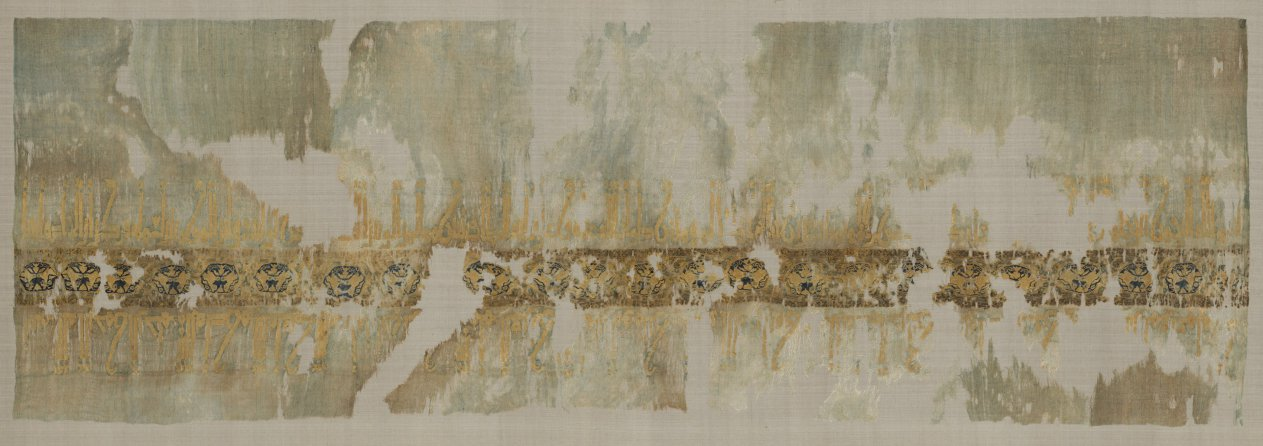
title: Turban end with tiraz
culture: Egypt, Tinnis, Fatimid period, datable to 983-90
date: 983–990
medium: plain weave with inwoven tapestry weave: linen and silk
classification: Textile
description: This finely woven linen cloth, dyed a cherished pistachio color, was cut from a longer fabric worn folded and wrapped as a turban with the silk tapestry-woven decoration shown off in the front. It contains two opposing rows of nearly identical Arabic text separated by a row of medallions displaying a pair of birds. The historical text begins by praising Allah, asking that he assist the Caliph al-‘Aziz and bless him and his ancestors. The inscription also specifies that the vizier Abu ibn Yusuf ordered the cloth from the private factory (tiraz) in Tinnis. This luxurious cloth could have been a gift from the caliph in Cairo during the Fatimid period to a courtier or visiting dignitary. It is one of the finest known examples.